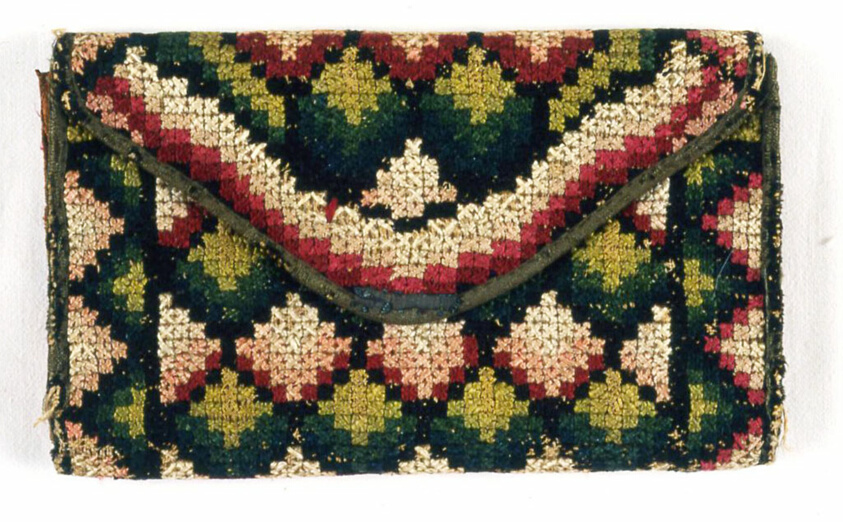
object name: Costume and Accessories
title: Wallet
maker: England or Scotland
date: 1779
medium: Linen, plain weave; embroidered with silk floss in crossed corners stitch; lined with leather tooled in gold leaf; edged in silk and plain weave; interior of leather and paper, painted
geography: England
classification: textile; needlework (visual works); accessories (object genre); costume accessory; costume